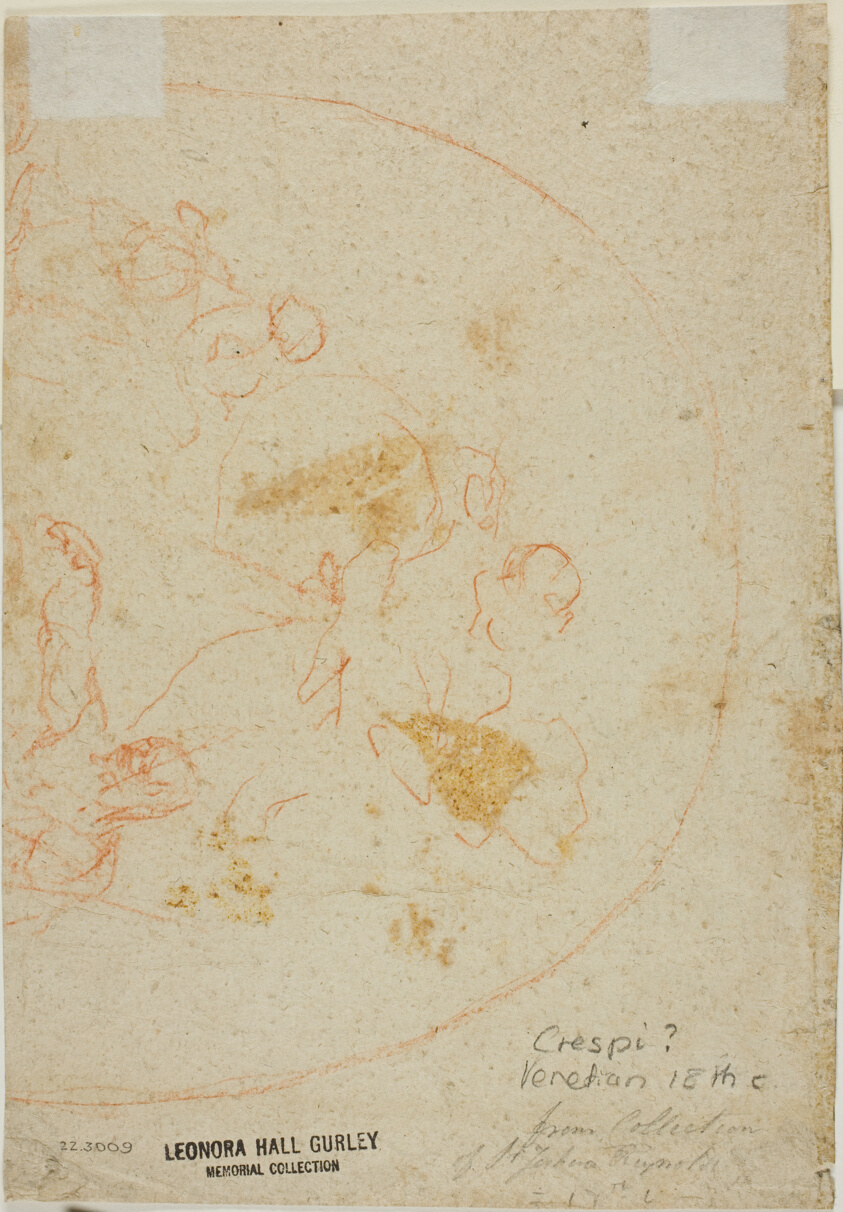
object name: Drawing and Watercolor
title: Virgin and Child (recto); Portion of Altarpiece Sketch (verso)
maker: Attributed to Flaminio Torre; Italian, 1621-1661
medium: Red chalk (recto) on gray-brown laid paper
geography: Italy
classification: chalk; drawings (visual works); prints and drawing